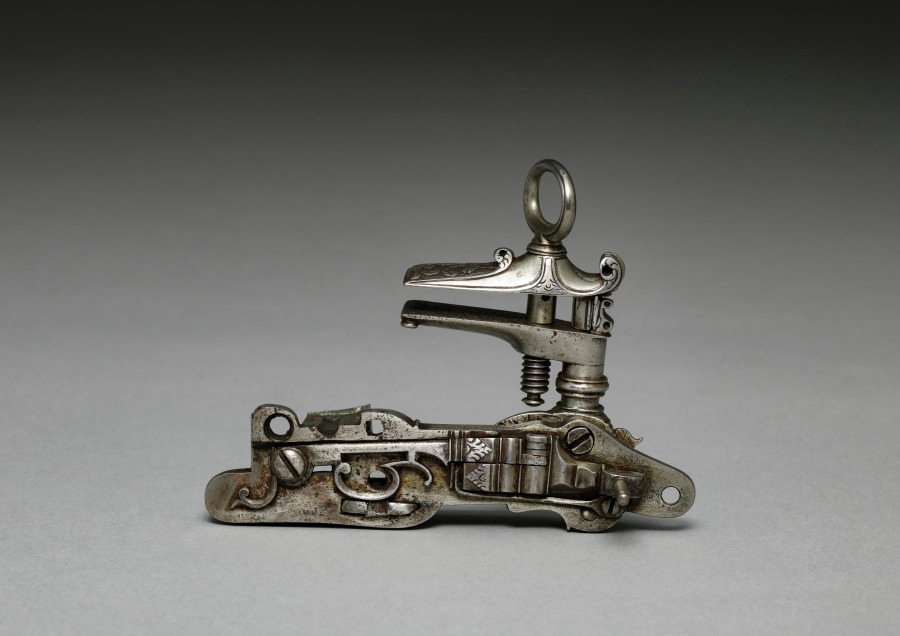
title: Snaphance Gunlock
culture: Spain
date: 1700s or early 1800s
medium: steel, engraved and chased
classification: Arms and Armor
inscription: signed: TANINE and L. ANDYOLOZ